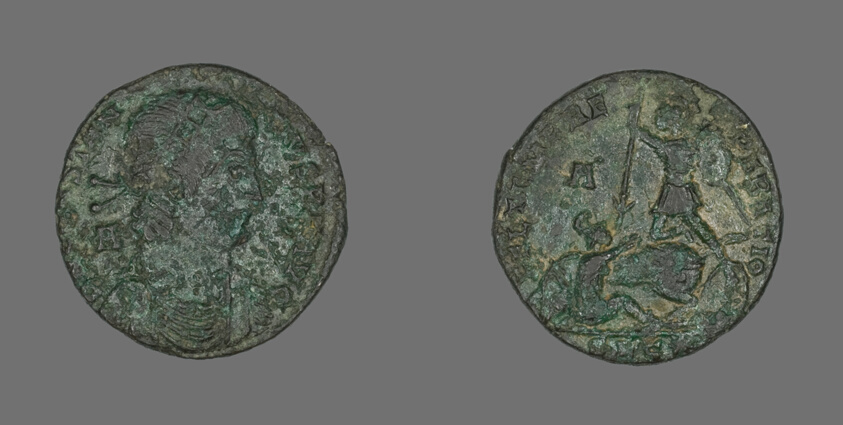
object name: Coin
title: Coin Portraying Emperor Constantius II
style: roman (ancient, style or period), ancient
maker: Roman, minted in Lyons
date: 348-350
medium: Bronze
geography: Roman Empire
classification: coin; ancient art